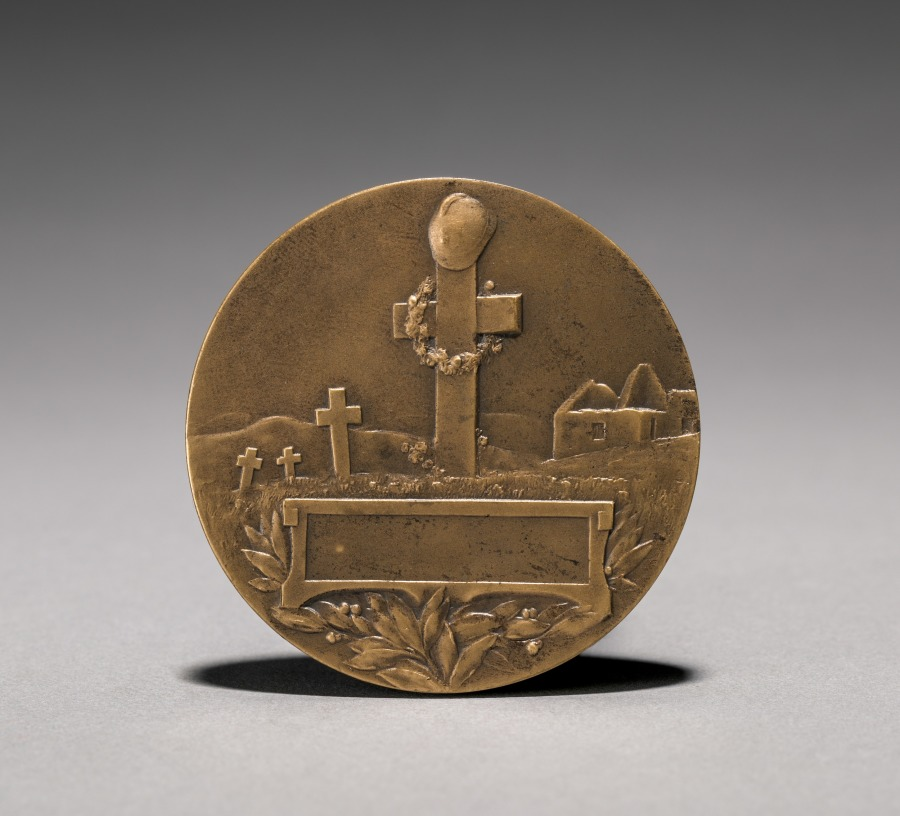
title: Medallion (reverse)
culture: France, 20th century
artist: Edouard Fraisse (French, 1880–1945)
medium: bronze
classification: Metalwork